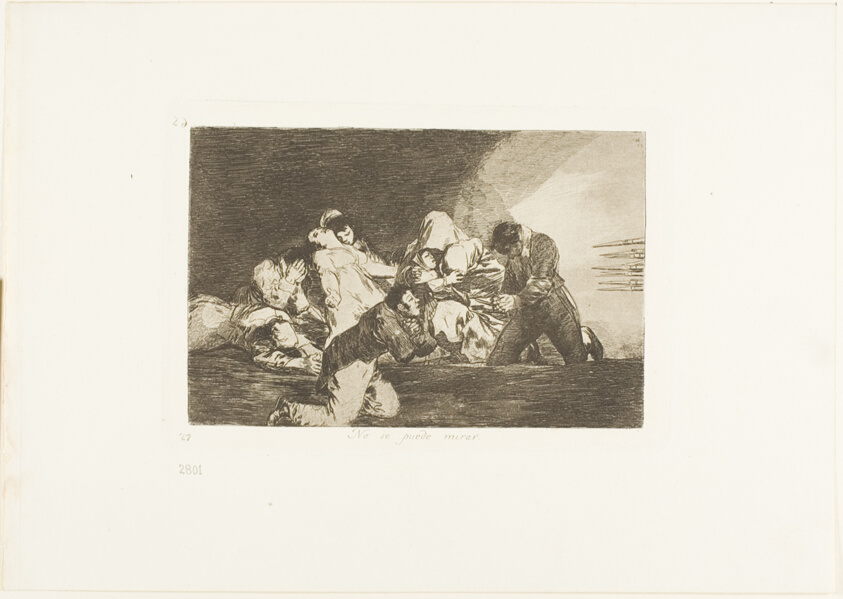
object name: Print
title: One Can't Look, plate 26 from The Disasters of War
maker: Francisco José de Goya y Lucientes (Spanish, 1746-1828)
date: 1810/12, published 1863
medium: Etching, burnished lavis, drypoint and burin on ivory wove paper with gilt edges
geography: Spain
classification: etching; print; prints and drawing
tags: war